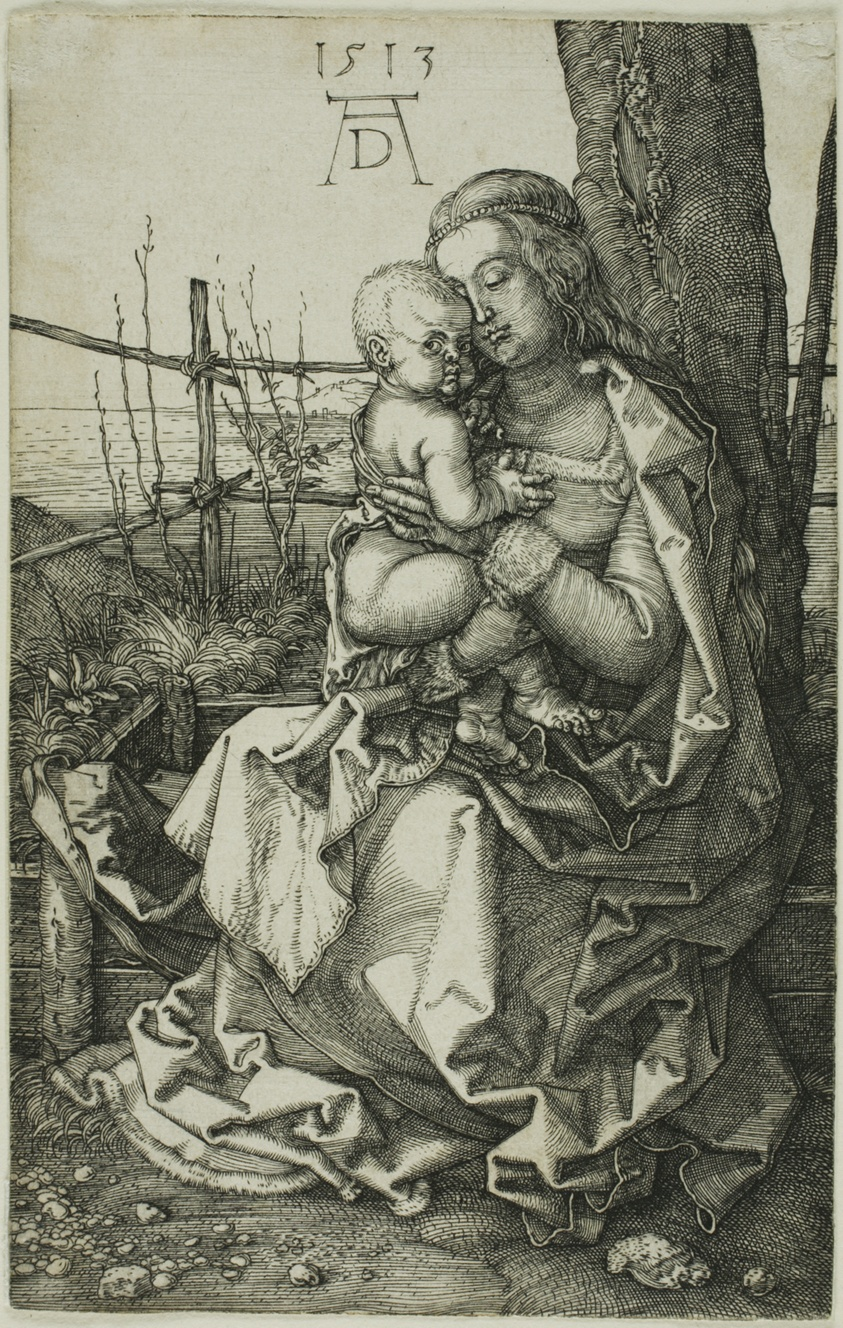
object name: Print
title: Madonna by the Tree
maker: Albrecht Dürer (German, 1471-1528)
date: 1513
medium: Engraving in black on ivory laid paper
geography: Germany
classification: engraving; print; prints and drawing; paper